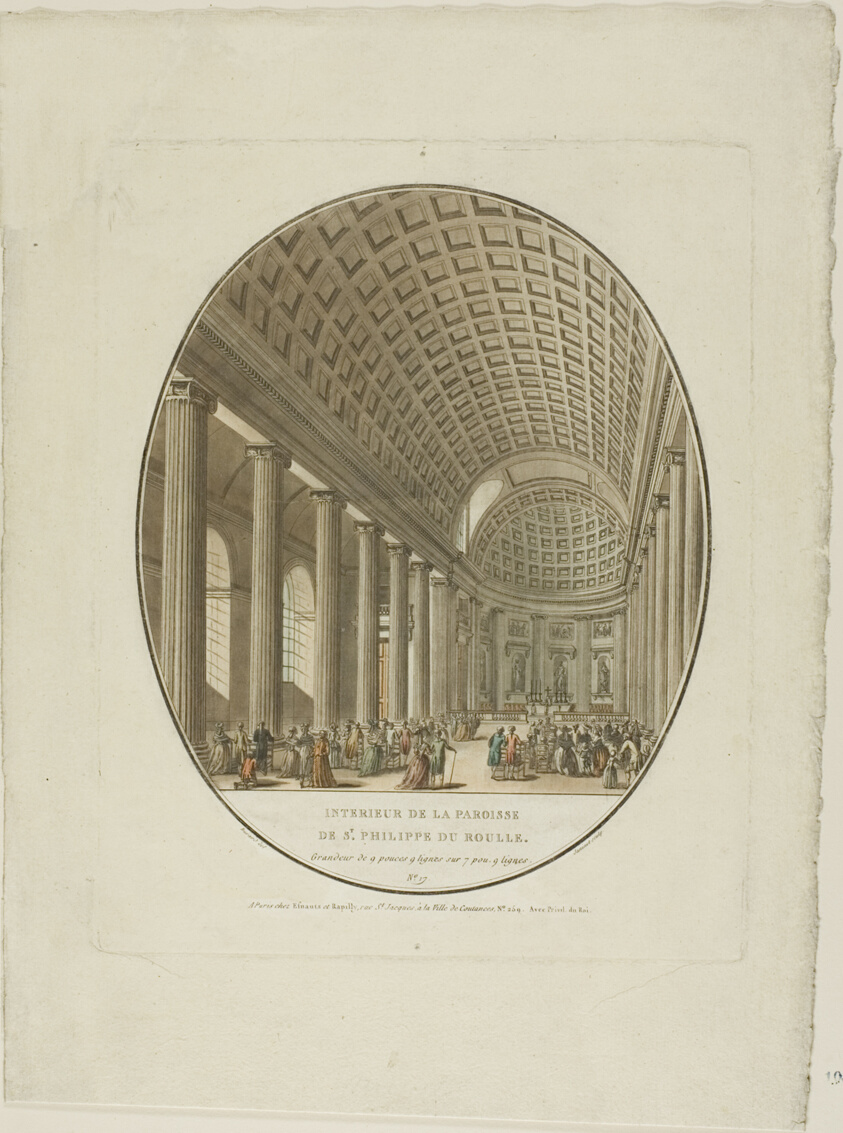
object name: Print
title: S. Philippe du Rouk, Paris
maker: Jean-François Janinet; French, 1752-1814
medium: Aquatint etching on paper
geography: France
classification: aquatint; print; prints and drawing